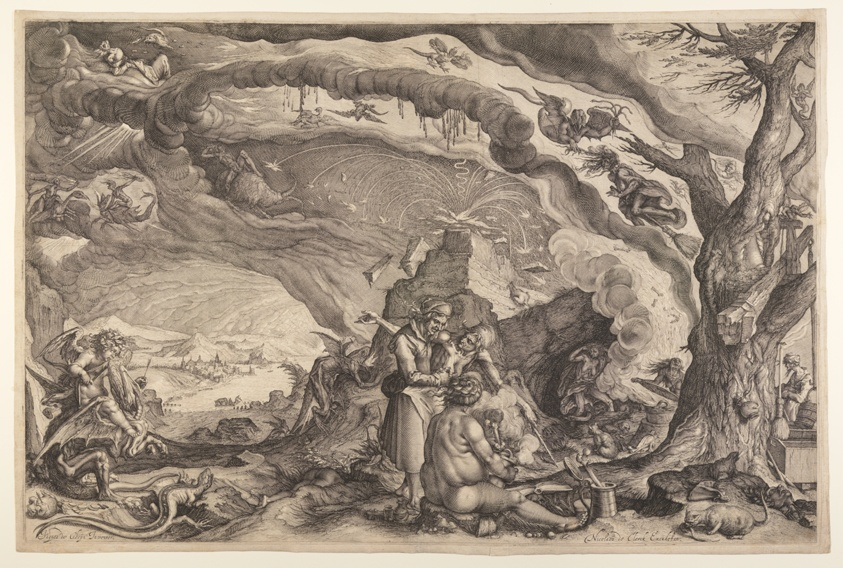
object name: Print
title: Witches Preparing for Sabbath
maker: Attributed to Andries Stock (Netherlandish, 1572/82-after 1648); after Jacques de Gheyn II (Dutch, 1565–1629)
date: c. 1610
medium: Engraving on ivory laid paper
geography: Netherlands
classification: engraving; paper; print; prints and drawing